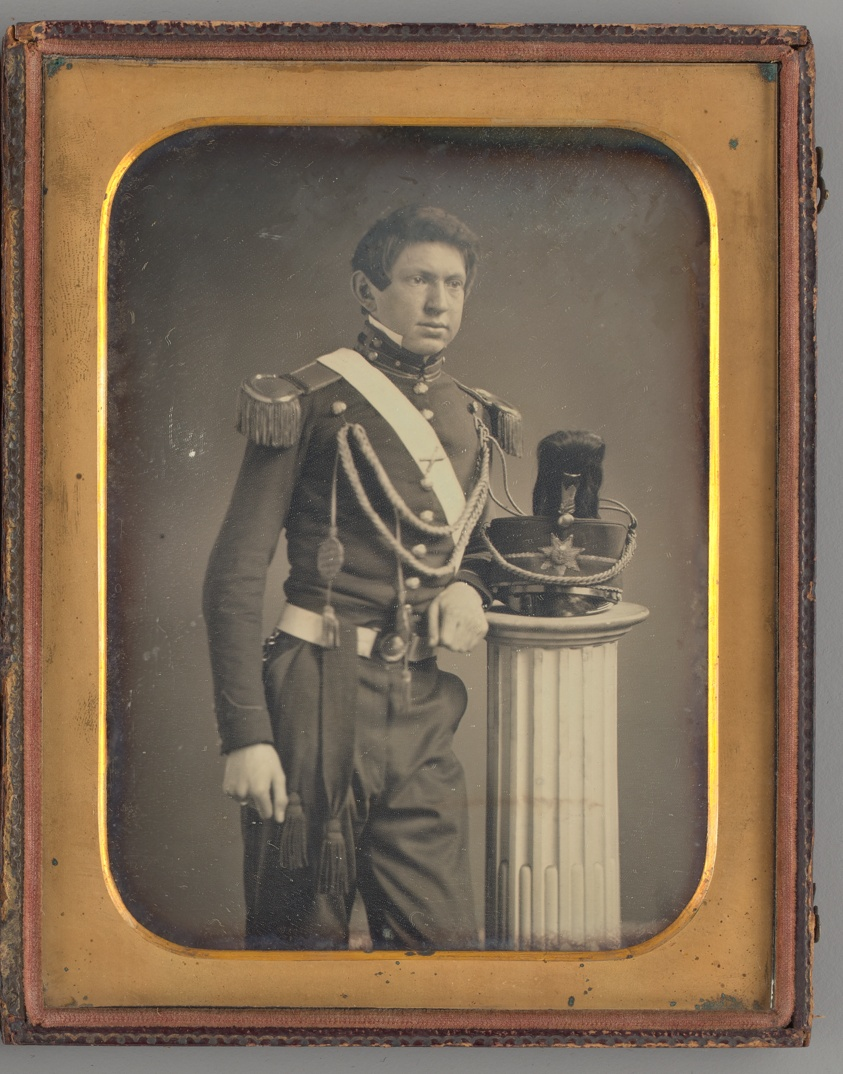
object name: Photograph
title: Untitled (Portrait of a Standing)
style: 19th century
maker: Unknown maker; American, 19th century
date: 1848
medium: Daguerreotype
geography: United States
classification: photography; daguerreotype; portrait; portrait; photograph; photographic process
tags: lundberg collection, military uniforms, military, uniforms, soldiers, portrait, portraits, portraits: male subject